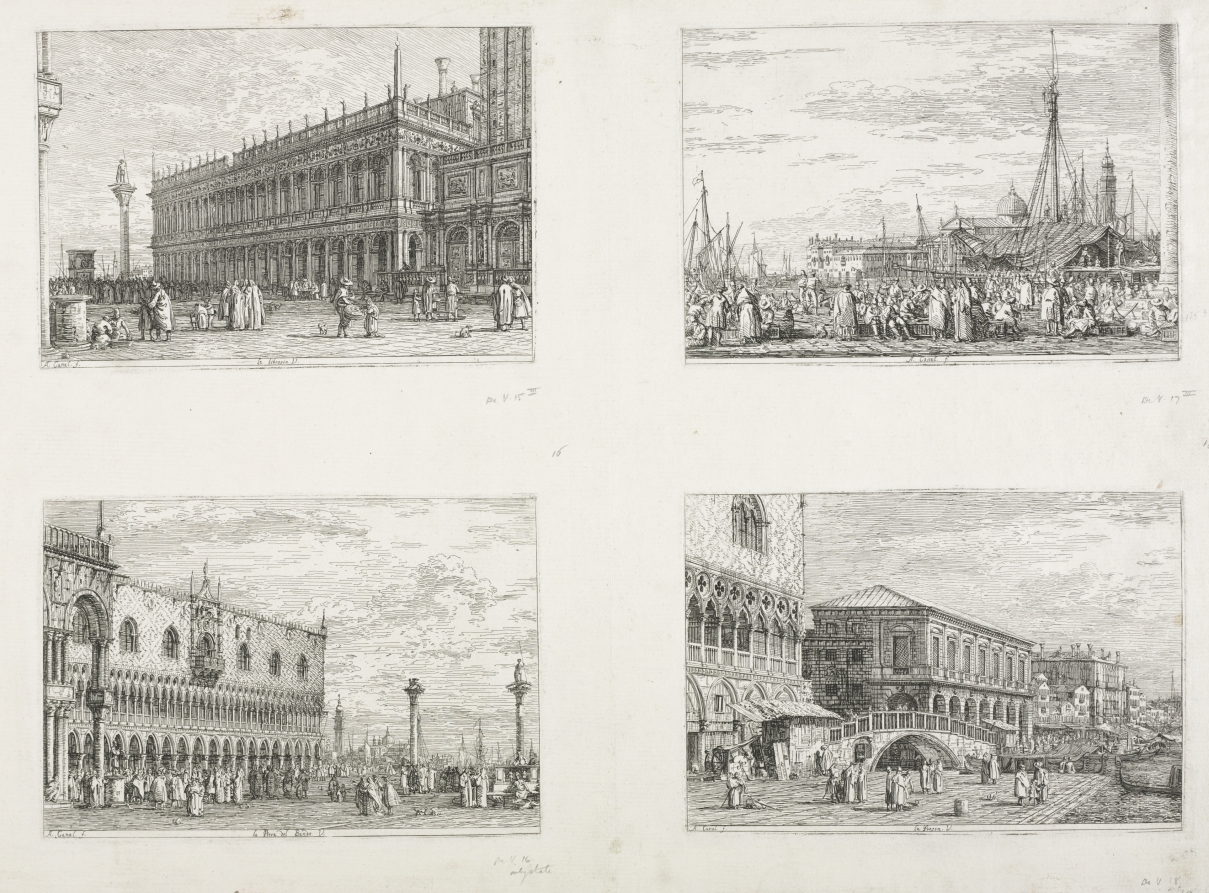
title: Views: The Library, Venice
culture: Italy, Venice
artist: Antonio Canaletto (Italian, 1697–1768)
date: 1735–1746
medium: etching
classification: Print